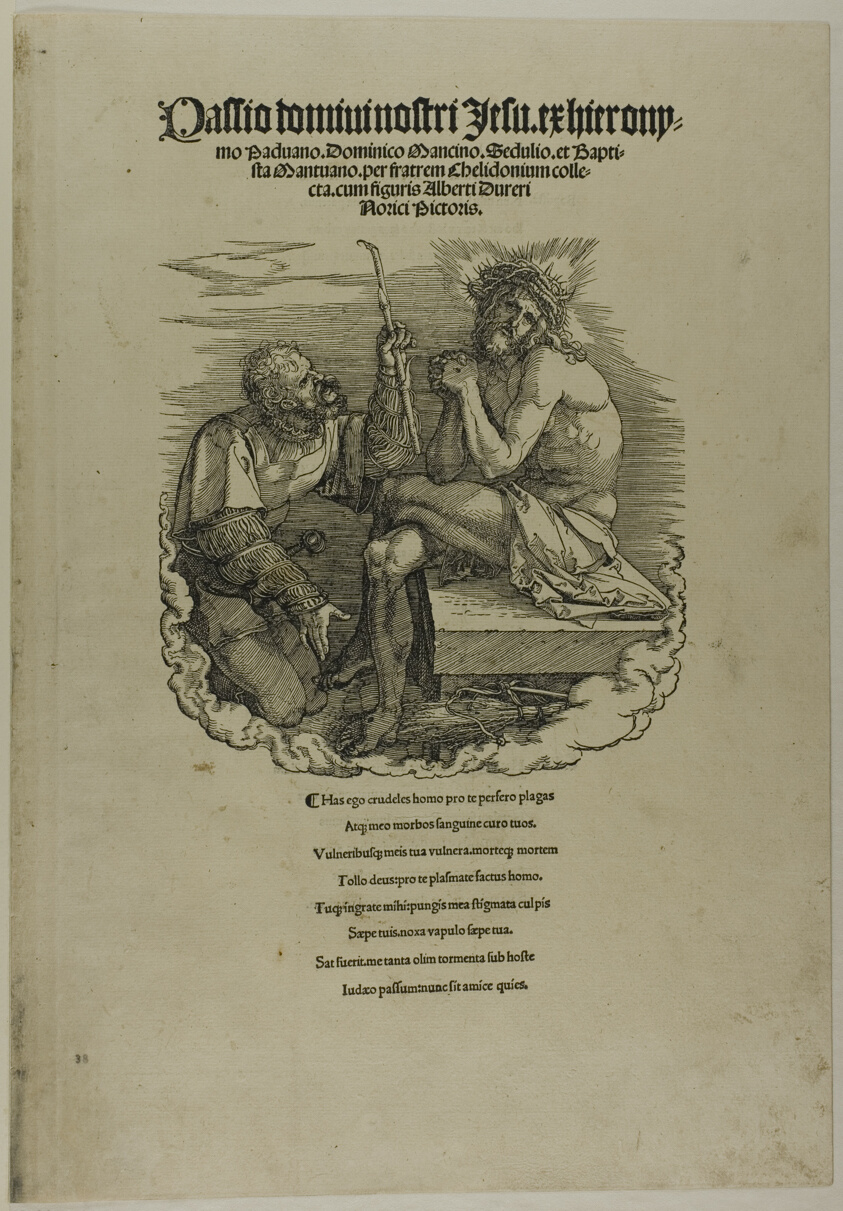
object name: Print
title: Christ, Man of Sorrows, Mocked by a Soldier, from The Large Passion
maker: Albrecht Dürer (German, 1471-1528)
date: 1511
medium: Woodcut in black on cream laid paper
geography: Germany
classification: woodcut; print; prints and drawing; paper